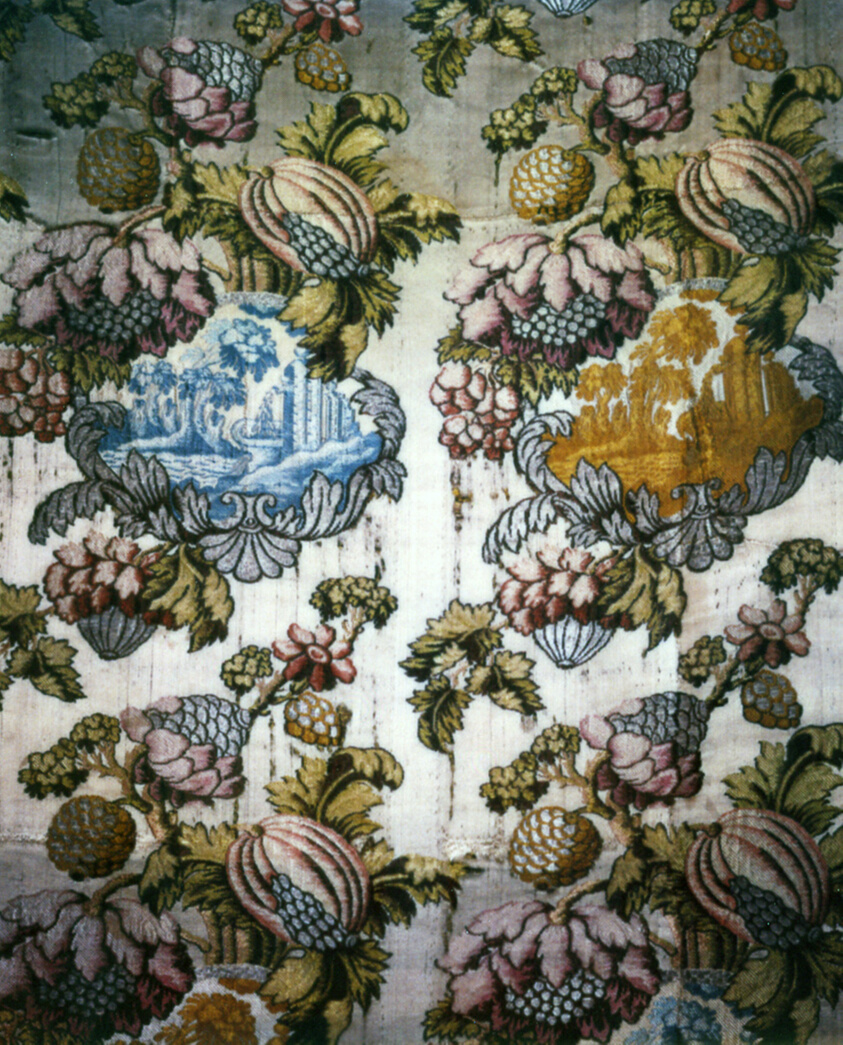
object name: Textile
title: Panel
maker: France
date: 1725/50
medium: Silk and silvered-metal-strip-wrapped silk, satin weave with brocading wefts and self-patterned by areas of twill interlacings and ground weft floats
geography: France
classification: textile; weaving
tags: flowers, Floating Gardens, fruit, trees, fountains